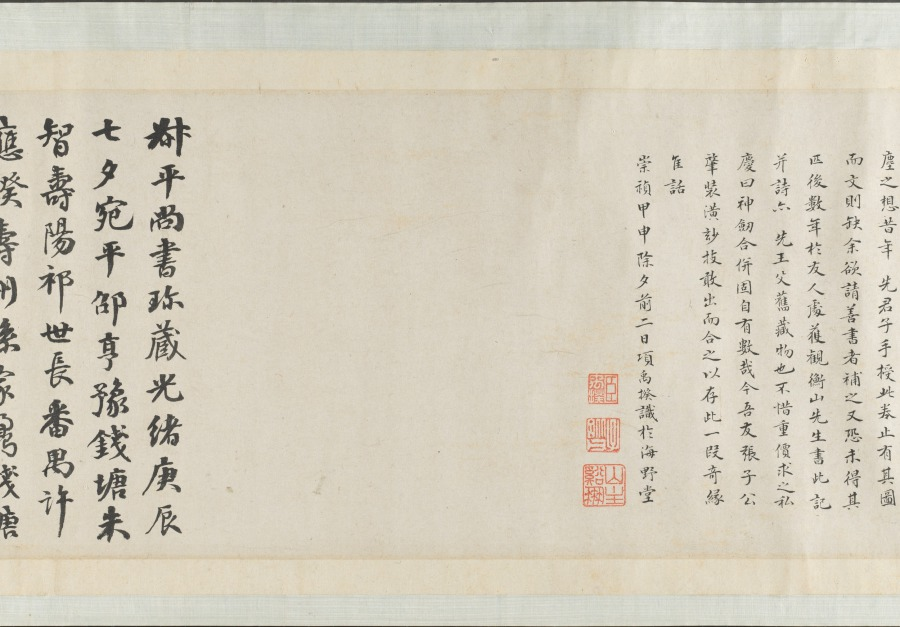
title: Garden for Solitary Enjoyment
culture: China, Ming dynasty (1368–1644)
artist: Qiu Ying (Chinese, 1494–1552)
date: 1515–52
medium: Handscroll; ink and light color on silk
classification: Painting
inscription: Accompanying text of an essay together with seven poems of Sima Guang (1019–1086) and one poem of Su Shi (1037–1101) written by Wen Zhengming (1470–1559) in 1558.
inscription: 2 colophons and 82 seals: 4 seals of Wen Zhengming 文徵明 (1470–1559); 59 seals of Xiang Yuanbian 項元汴 (1525–1590); 1 colophon, dated 1644, and 7 seals of Xiang Yukui 項禹揆 (c. late 1500s–1659); 1 colophon, dated 1880, and 2 seals of Weng Tonghe 翁同龢 (1830–1904); 2 seals of Ch'eng Chen-i (19th c.); 1 seal of Han Ch'ung (19th c.); 4 seals of Wan-go H. C. Weng 翁萬戈 (1918–2020); 3 seals unidentified.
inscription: Colophon by Xiang Yukui 項禹揆 (c. late 1500s–1659): The painting of The Garden for Self-enjoyment on the right by Shih-chou, Mr. Qiu [Qiu Ying] is in the style of Li Lung-mien. Its mood is peaceful, as if meeting the ancient gentlemen face to face among the brushes and silk; it lifts one above the sordid bustle of life. Formerly, my late father handed me this scroll which had only the painting without the written essay. I considered asking a good calligrapher to write the essay to add to it but was afraid that the quality of the writing would not match the painting. Several years later, I saw at a friend's house this essay and poems (of Ssu-ma Kuang] written by Hengshan [Wen Zhengming], once owned by my grandfather; so I spared no expense to obtain it. I rejoiced at this and said: "The divine swords are finally united. How things are pre-destined!" Now my friend Chang Kung-chao's technique for mounting [painting and calligraphy] is excellent. Therefore by daring to take them out and join them together, I can preserve this beautiful story of singular reunion. Xiang Yukui recorded at Hai-yeh-t'ang [hall] two days before New Year's Eve in the jiasheng year of the Chongzhen era [1644]. trans. LYSL/HK/WKH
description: Garden of Solitary Enjoyment refers to a site built in 1073 by the statesman Sima Guang (1019–1086) after he had retired to Luoyang, Henan province. Every spring, visitors would flock to his garden. Each of its seven structures references a historic figure. Sima wrote: I channel streams [like Du Mu], to water flowers [like Bai Juyi], or trim bamboo [like Wang Huizhi]. . . . I know of no joy between heaven and earth that could take its place. Qiu Ying’s painting, created after an 11th-century version of the same theme, must have appealed to garden owners of the Ming dynasty, since it became the template for numerous Suzhou workshop copies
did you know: Sima Guang completed his monumental survey of Chinese history, Zizhi tongjian, in the garden depicted in this painting.